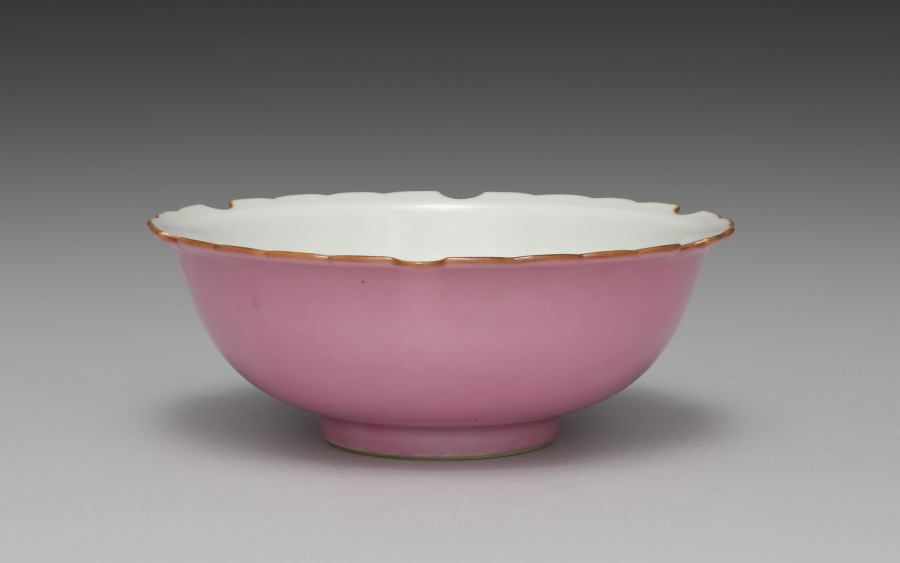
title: Dish from Snow-Flake Side Dishes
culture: Japan, Meiji period (1868–1912)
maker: Seifū Yohei III (Japanese, 1851–1914)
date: 1893–1914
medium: One from a set of six porcelain dishes; porcelain with lobed rims and pink glaze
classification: Ceramic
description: According to the box lid, this set of six side dishes, or mukōzuke, are “snow-flower style” (sekkashiki), having mouths shaped like snowflakes. Their mouths, which have six lobes and scalloped edges, are traced with brown iron oxide at the rim. The outside of each bowl is glazed with a very bright pink over the basin and foot, and the inside is left white. From directly above, one sees a snowflake-like shape, and from the side, they seem to float above a rosy ground.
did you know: The box for this set of dishes has an inscription on the side noting that they were for a person with the family name Nakamoto.